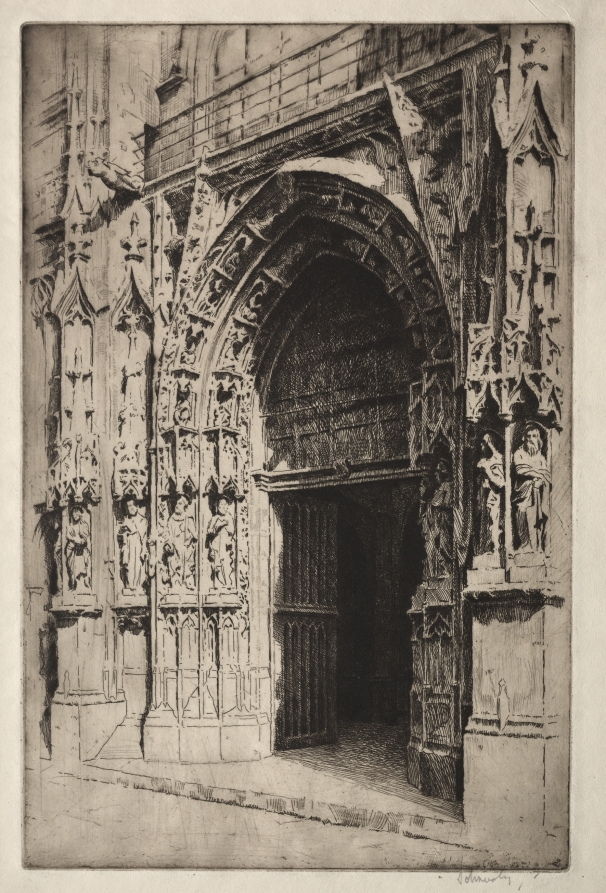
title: Portrail Central, Eglise St. Merri, Paris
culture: America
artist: Otto J. Schneider (American, 1875–1946)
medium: etching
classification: Print